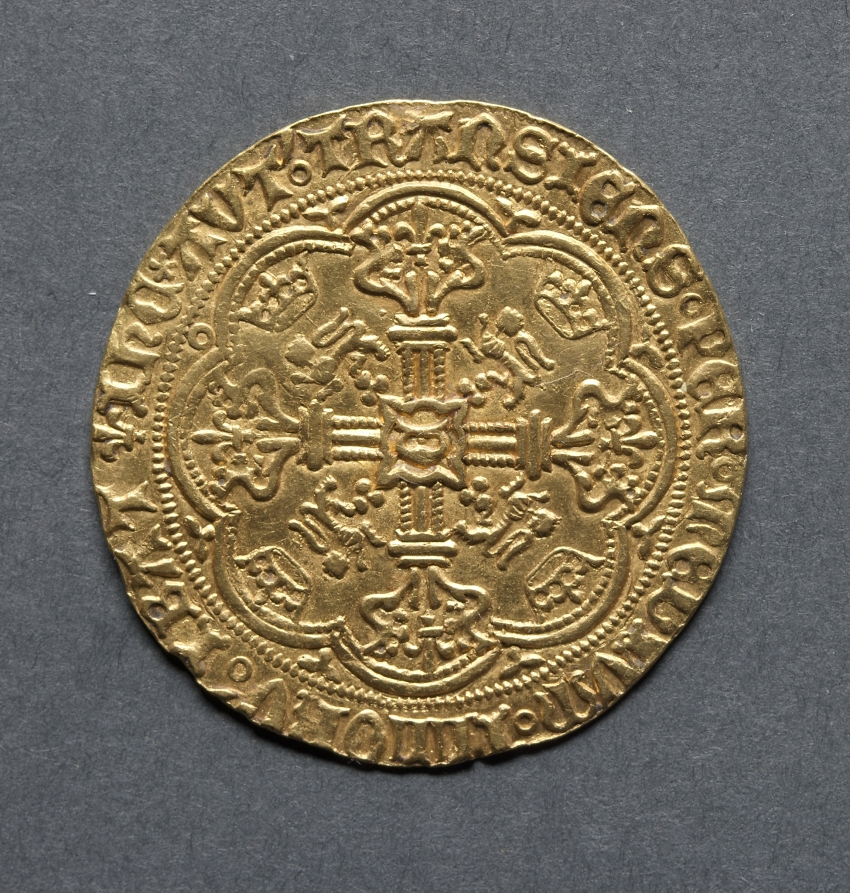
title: Noble: Ornamental Cross with Lis Terminals (reverse)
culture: England, Henry VI, 1422-1461 (restored 1470-1471)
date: 1422–1461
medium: gold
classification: Coins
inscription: IHC AUT TRANSIENS PER MEDIUM ILLORR IBAT